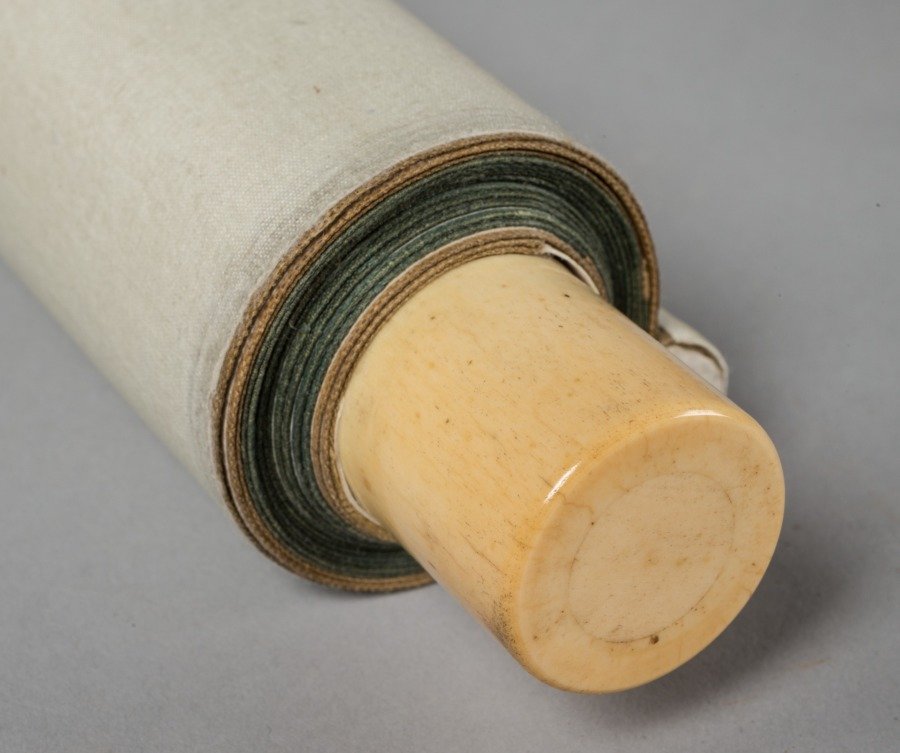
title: Goose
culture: Japan, Edo period (1615–1868)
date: c. 1615–99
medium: hanging scroll; ink on paper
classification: Painting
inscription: spurious seal of Sesshu, lower right.